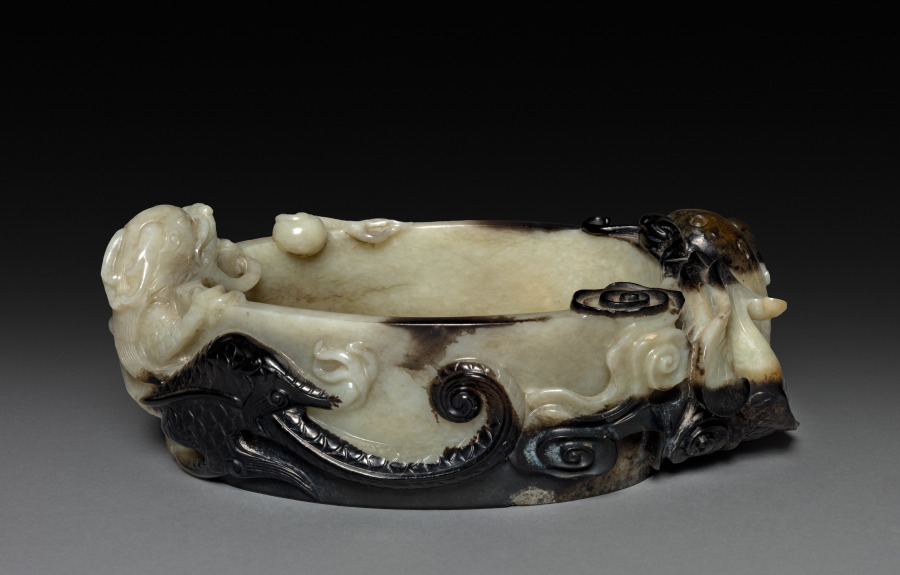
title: Dish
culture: China, Ming dynasty (1368–1644)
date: 1368– 1644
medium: jade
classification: Jade